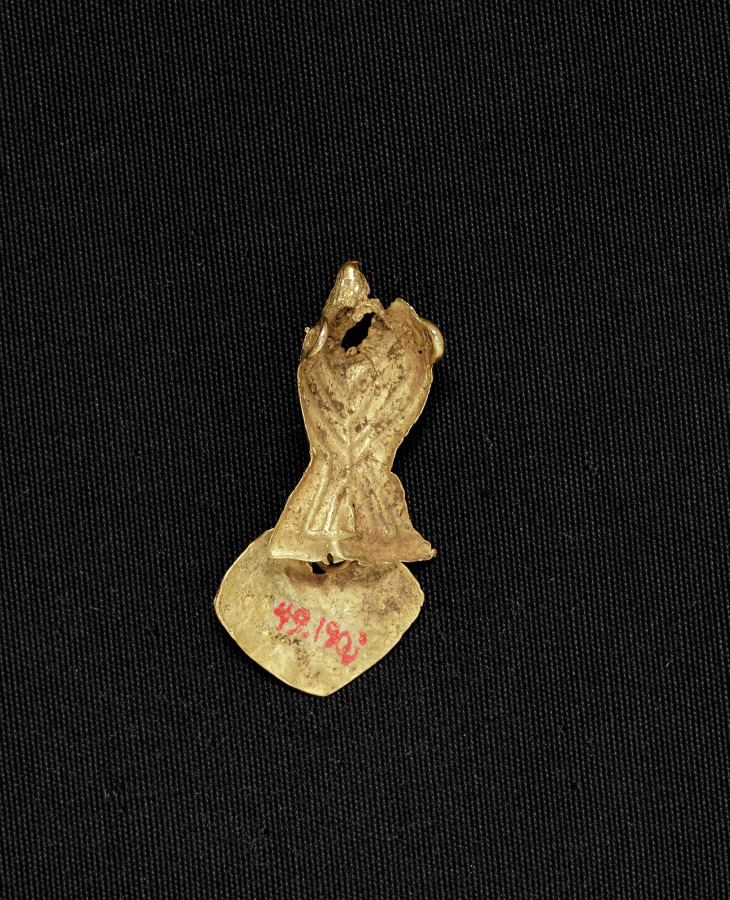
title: Bird Bead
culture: Colombia, Muisca style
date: c. 900–1550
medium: cast gold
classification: Jewelry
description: Muisca metalwork divides into two categories: ornaments to be worn, such as these, and offering figurines, in the case to the right. The elaborate bird pendant features delicate herringbone moldings, openwork patterns, and wing details-all part of the wax model from which the pendant was cast (see nearby computer animation). The dangles were attached after casting.